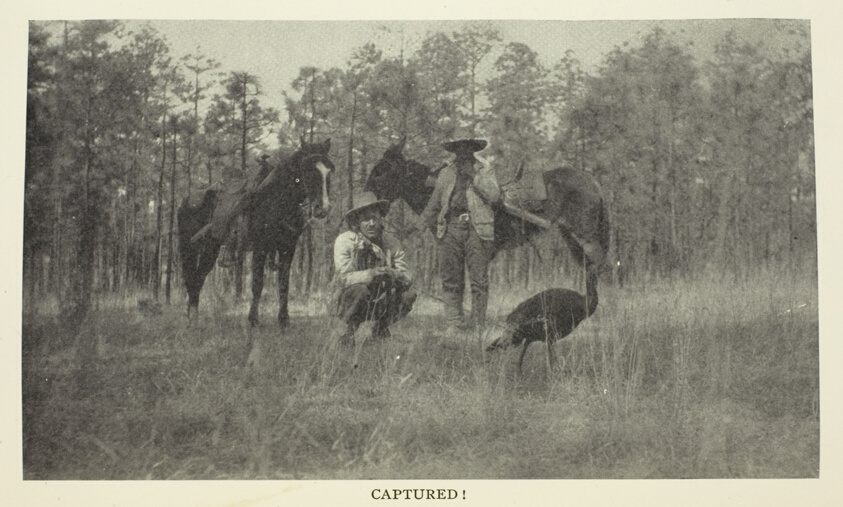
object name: Photograph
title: Reminiscences of Outdoor Life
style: 19th century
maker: William Kent (English, 1685–1748)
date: 1865/95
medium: Offset lithograph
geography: England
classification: photography; halftone; photomechanical process; photograph